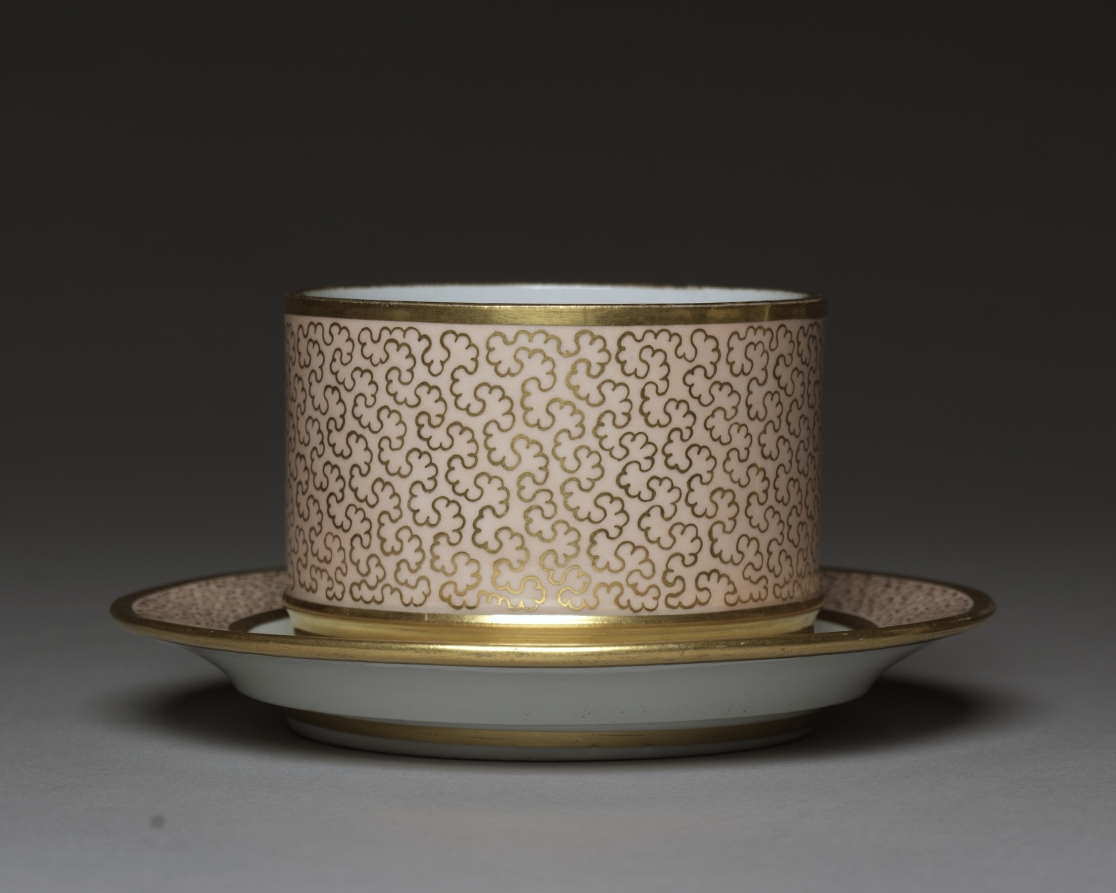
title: Dish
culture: England, Worcester, early 19th Century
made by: Worcester Porcelain Factory (British, established 1751)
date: c. 1810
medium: soft-paste porcelain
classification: Ceramic